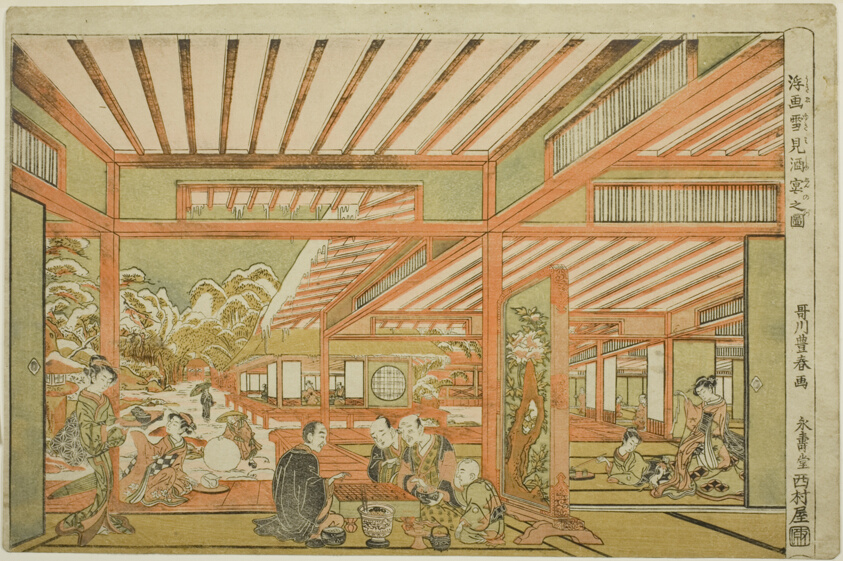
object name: Print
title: Snow-Viewing Entertainment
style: Japanese (culture or style)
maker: Utagawa Toyoharu (Japanese, 1735-1814)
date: c. 1771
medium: Color woodblock print; large oban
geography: Japan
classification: woodblock print; print; asian art